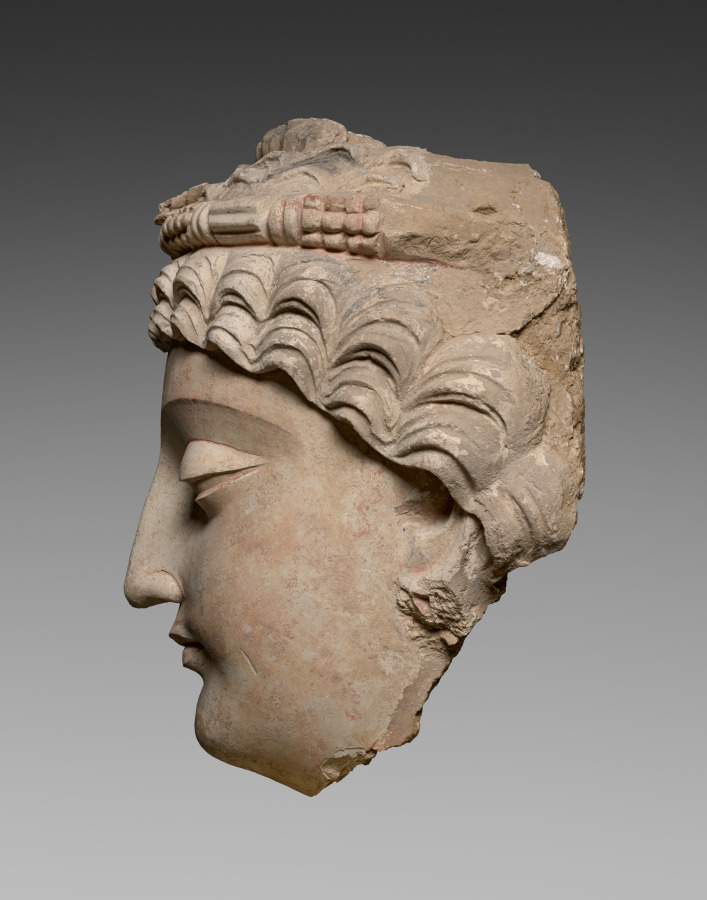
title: Head of Bodhisattva Avalokiteshvara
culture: Afghanistan or Pakistan, Gandhara, Kushan period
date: 300s–400s CE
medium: stucco with traces of paint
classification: Sculpture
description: By this period, individual bodhisattvas were beginning to be revered as ideal figures who would deliberately postpone their own enlightenment and entrance into final nirvana, which is a state from which no one returns to be reborn into this world. Bodhisattvas accomplish all but the final meditation leading to full enlightenment, but they are considered to be so advanced in their practice and realization that they have the ability to control their rebirth and act in righteous and compassionate ways to help others achieve enlightenment. Because the remains of a lotus pedestal on which a Buddha sat is at the center of the diadem, this head can be identified as that of the Bodhisattva of Compassion. The idealized linearity of the brows and eyes along with the formalized waves of hair give an ethereal quality to the otherwise naturalistic face.